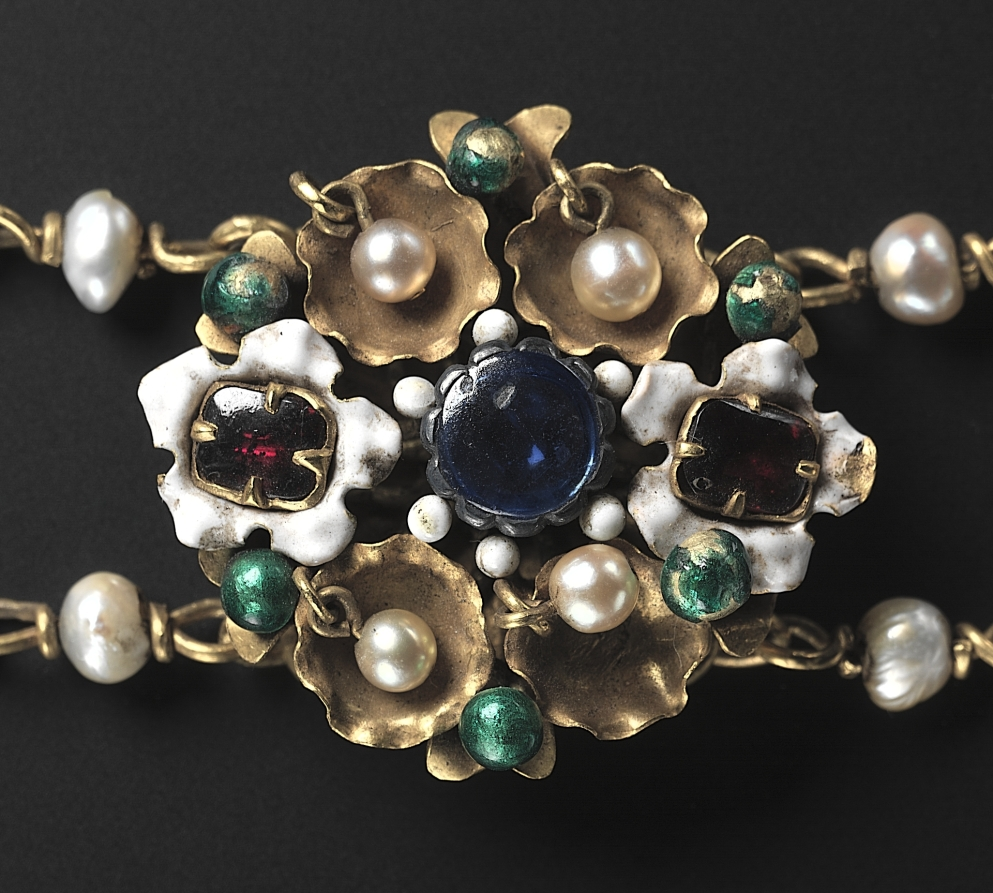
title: Twelve Medallions Mounted as a Necklace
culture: France, Paris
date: c. 1400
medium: enameled gold, precious stones, and pearls; some later additions with modern chain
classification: Jewelry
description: These medallions, which have loops on the backs, must have originally been sewn onto a garment or, more likely, a woman’s headpiece. In spite of the modern chain to which they are now attached, the medallions are unique items of feminine apparel from around 1400. Such items would have been well known at the courts of the Valois in Paris, Bourges, and Dijon. The central medallion with a “white lady” is enameled “in the round”––a new Parisian technique for enameling irregular or three-dimensional surfaces. Such white lady medallions are described in inventories of the period